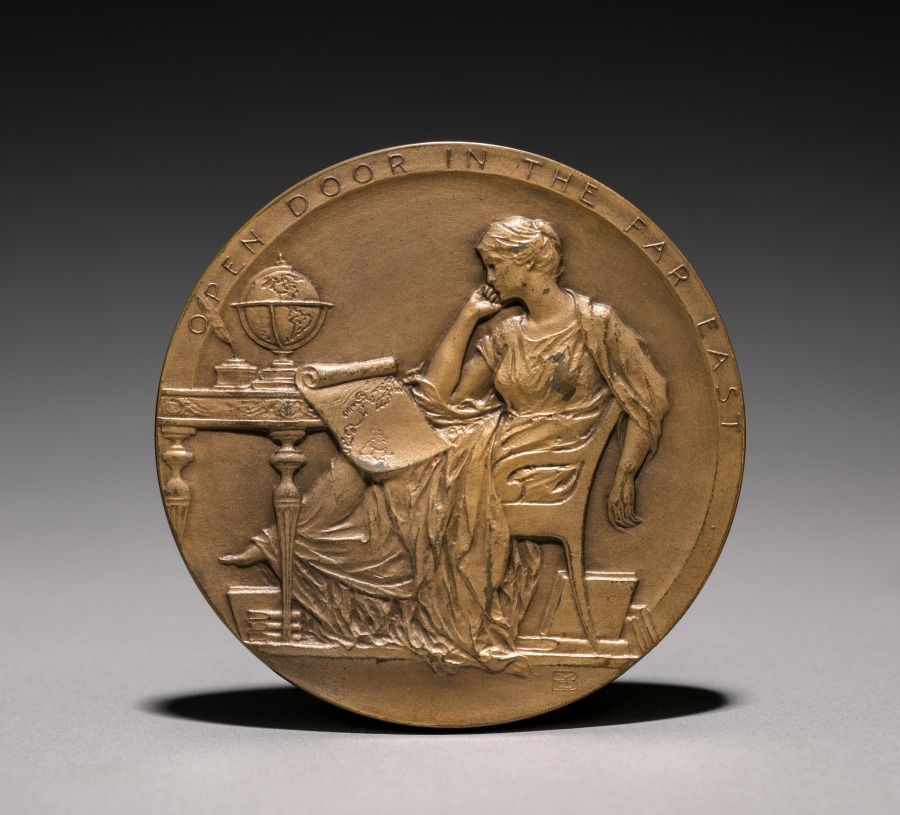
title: John Hay Medal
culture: America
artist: Victor D. Brenner (American, 1871–1924)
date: 1912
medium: bronze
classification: Metalwork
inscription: above: "JOHN HAY"; below: "THE ROWFANT CLVB CLEVELAND, OHIO."